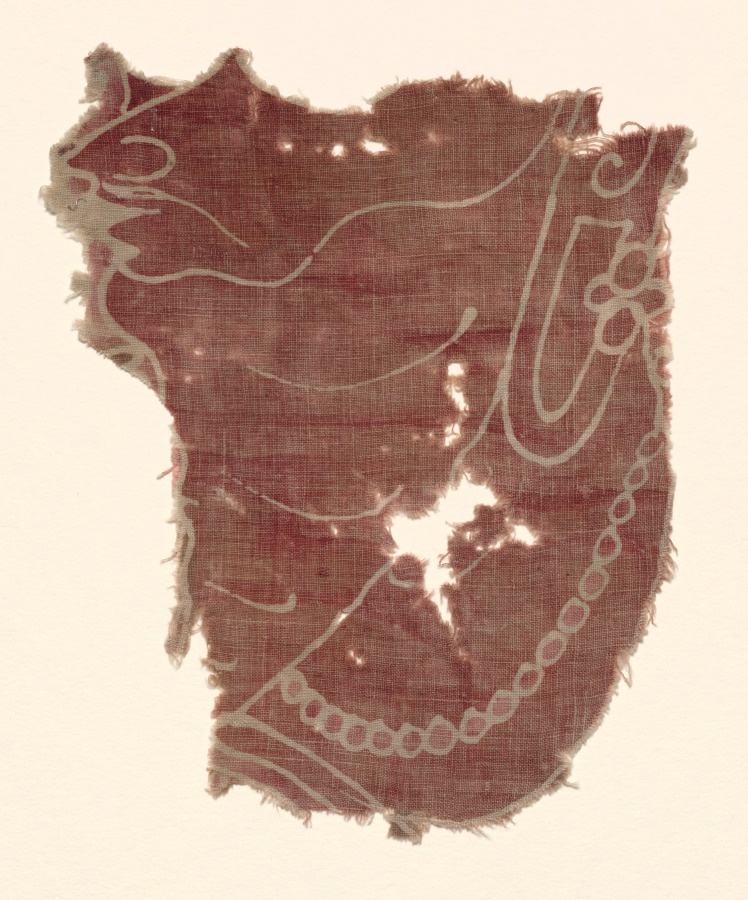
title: Fragment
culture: India, 12th-14th century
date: 1100s-1300s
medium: plain cloth, resist dyed; cotton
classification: Textile